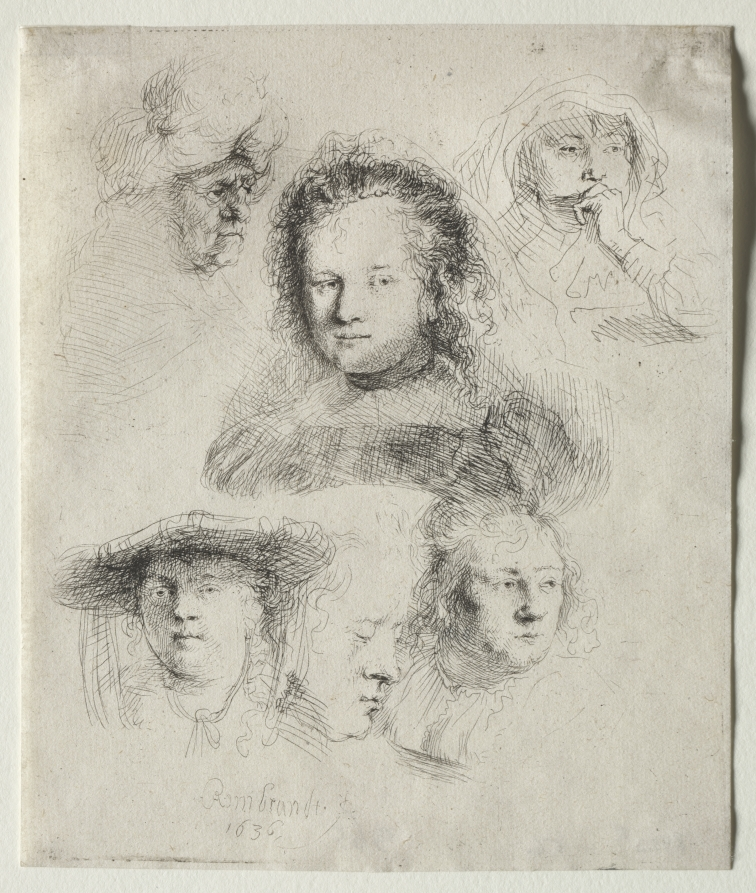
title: Studies of the Head of Saskia and Others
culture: Netherlands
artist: Rembrandt van Rijn (Dutch, 1606–1669)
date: 1636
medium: etching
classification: Print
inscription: lower left, in plate: Rembrandt. f./ 1636 ; VERSO, lower left, in graphite: R923 R 56 ; lower center, in graphite: 365